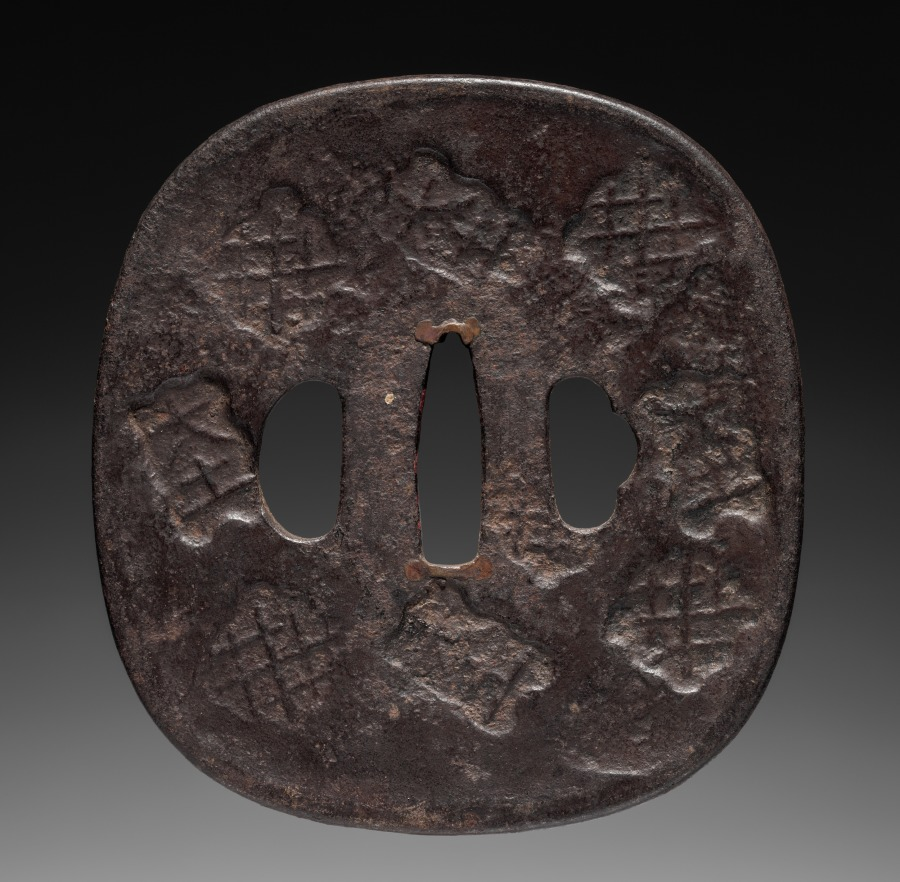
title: Sword Guard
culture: Japan, Momoyama period (1573–1615)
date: late 1500s-early 1600s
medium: iron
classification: Arms and Armor